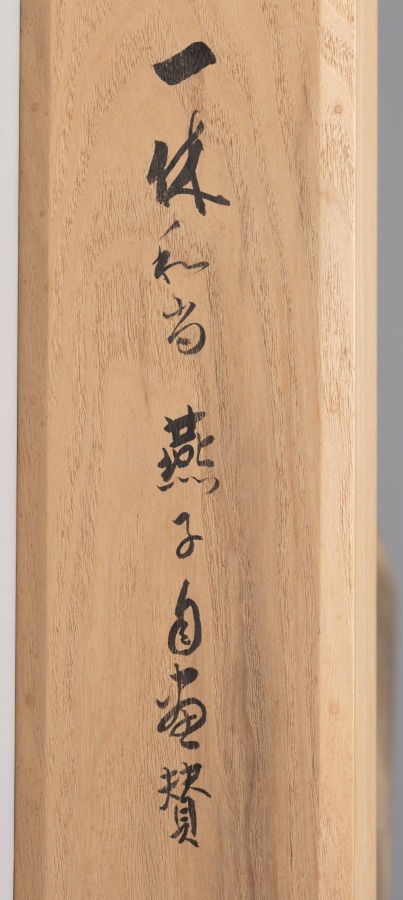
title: Calligraphy with Willow and Swallows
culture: Japan, Muromachi period (1392–1573)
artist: Ikkyū Sōjun (Japanese, 1394–1481)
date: 1400s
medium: hanging scroll, ink on paper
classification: Painting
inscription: How many days has it rid itself of the crow’s cloth? It knows not!/ Lovely is its body so nimble and neat./ Neither men of wealth, courtly position, or power can come close to the unfettered, noble swallow!/ With the coming of spring, it seems to be flying about, dancing around the grass hut of the foolish Priest. signed: Unkasō Isshi Tōkai jun Ikkyū shi ga ippitsu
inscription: outer box inscribed: Ikkyū Ōshō Enshi-zu Jigasan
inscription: inner box side lid inscribed: Showa 50 (1975), November by Tayama Honan with kao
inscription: Inner box side lid inscribed: Ikkyū Ōshō Bokuseki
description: The famed Buddhist monk Ikkyū is best remembered for his calligraphy. Calligraphic conventions of his time called for brushwork that did not vary much in style from character to character. However, as Ikkyū’s lines progress, his brushwork wanders between standard script and a sort of shorthand, marked by an uneven distribution of ink and a reduction of the characters to only the most necessary strokes. Ikkyū’s direct communication of emotion via brushwork became characteristic of the works produced by monks affiliated with the temple Daitokuji later in the Edo period (1615–1868).